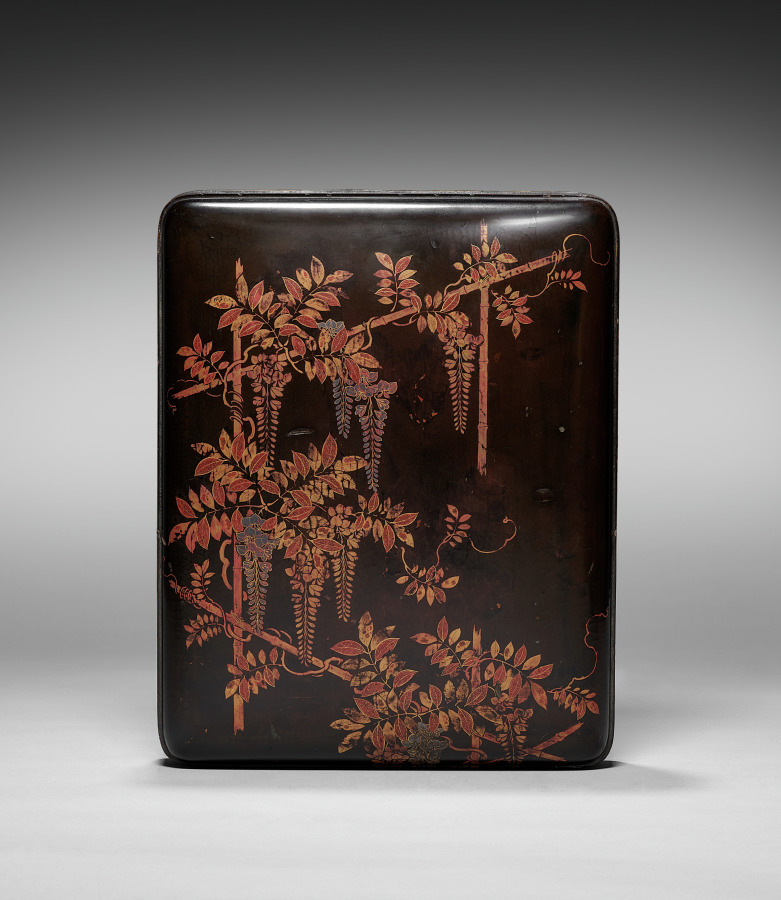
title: Cosmetic Box (lid)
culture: Japan, Momoyama period (1573–1615)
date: 1573–1615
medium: wood with lacquer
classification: Lacquer